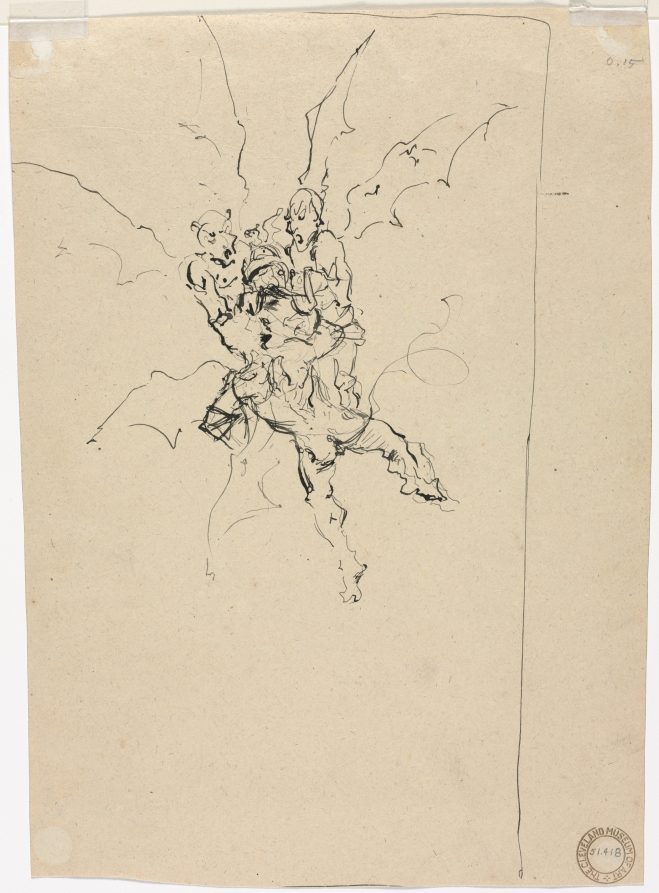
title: Three Demons Holding a Knight (verso)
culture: Italy, 20th century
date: 1900s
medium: pen and black ink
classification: Drawing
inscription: upper right, in graphite: 0.15